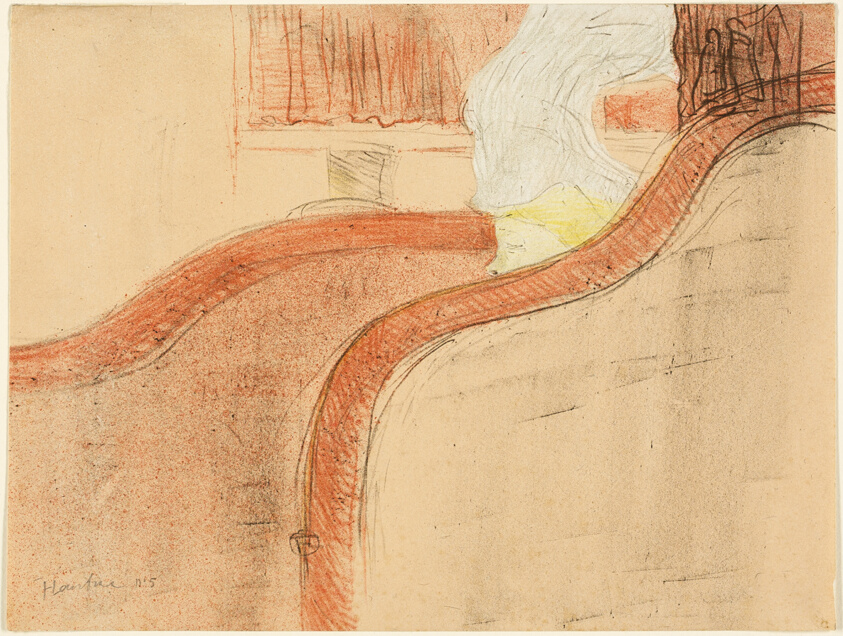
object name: Print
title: The Little Box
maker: Henri de Toulouse-Lautrec (French, 1864-1901)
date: 1897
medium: Color lithograph on ivory wove paper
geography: France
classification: lithograph; print; prints and drawing